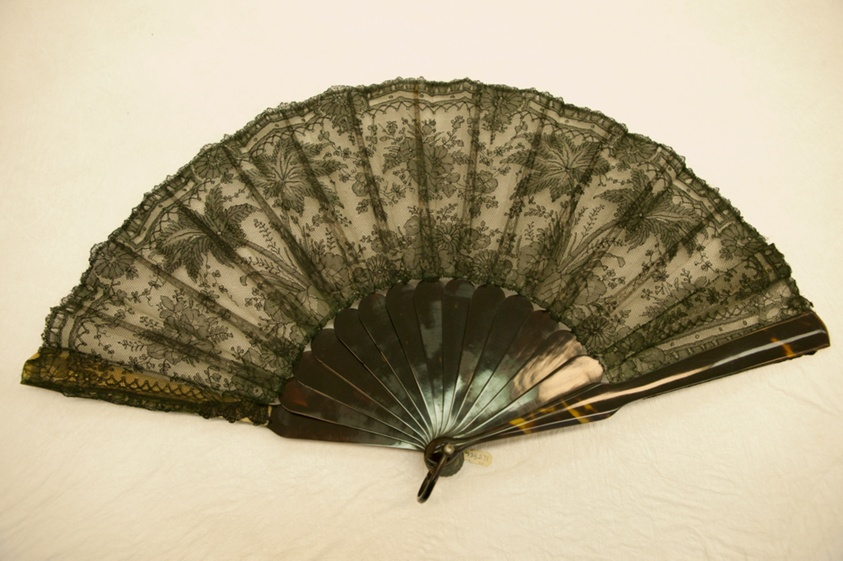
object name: Costume and Accessories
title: Fan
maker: France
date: 1870/1890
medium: tortoiseshell(?), ribs, slips, and guardsticks; silk, bobbin lace; lined with silk, gauze weave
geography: France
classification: textile; fan - lace; costume accessory - folding fan; costume accessory; costume